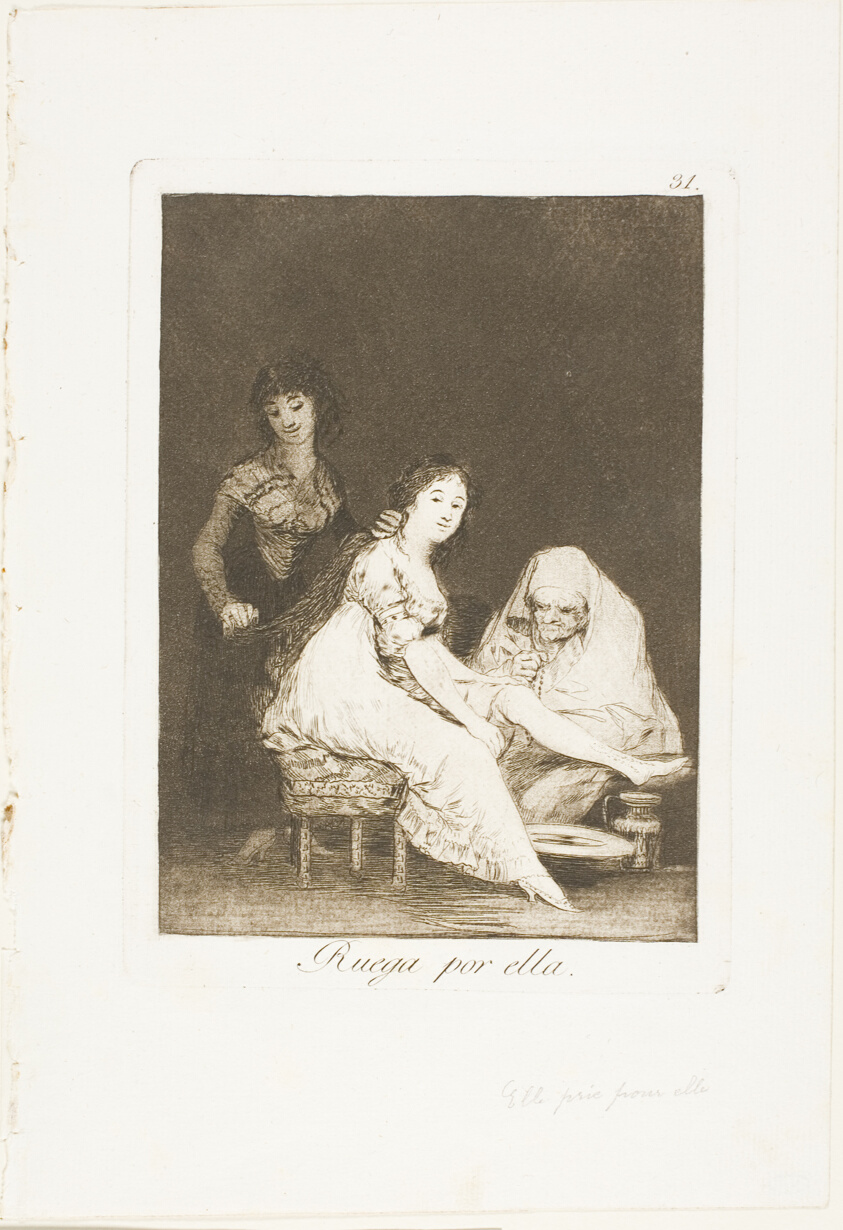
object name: Print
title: She Prays for Her, plate 31 from Los Caprichos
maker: Francisco José de Goya y Lucientes (Spanish, 1746-1828)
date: 1797/99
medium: Etching and aquatint on ivory laid paper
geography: Spain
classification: etching; print; prints and drawing